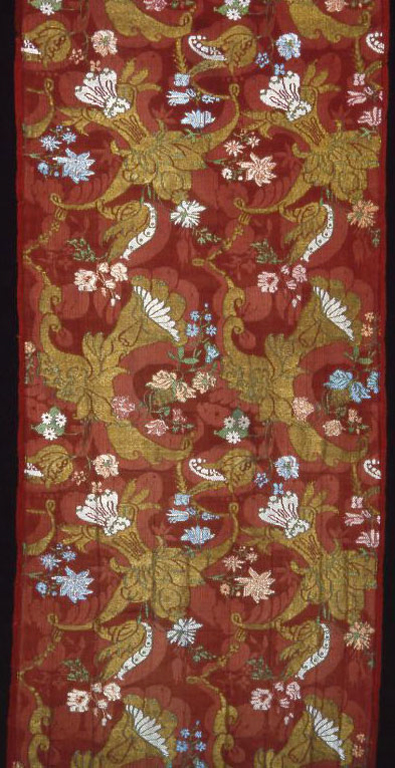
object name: Textile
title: Four Panels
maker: France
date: c. 1711/12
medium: Silk and gilt-metal-strip-wrapped silk, 4:1 satin weave with supplementary brocading wefts bound in 4:1 twill interlacing and self-patterned by reversing of faces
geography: France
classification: textile; weaving